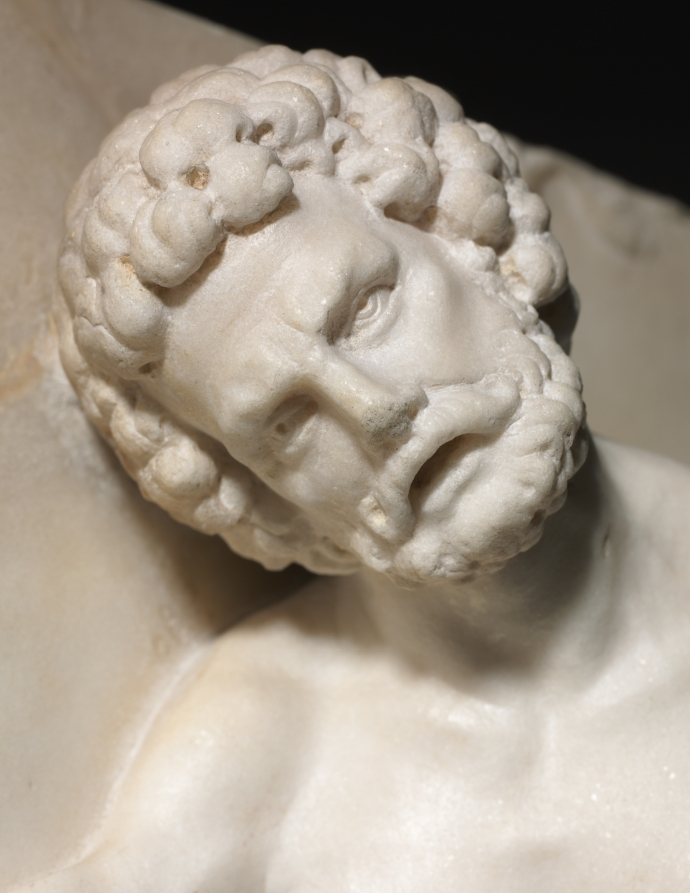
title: Philoctetes on the Island of Lemnos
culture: Italy, 16th century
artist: workshop of Giovanni Maria Mosca (Italian, 1495/99–1574)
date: c. 1510–1515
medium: marble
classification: Sculpture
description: A snake bit the Greek warrior Philoctetes en route to the Trojan War. The stench of the infected wound led the ship’s crew to abandon him on the island of Lemnos, where he fans the agonizing injury with a bird’s wing. The warrior’s noble suffering in the face of tremendous pain would have been a classical model of stoic composure, highly valued in Renaissance court culture.